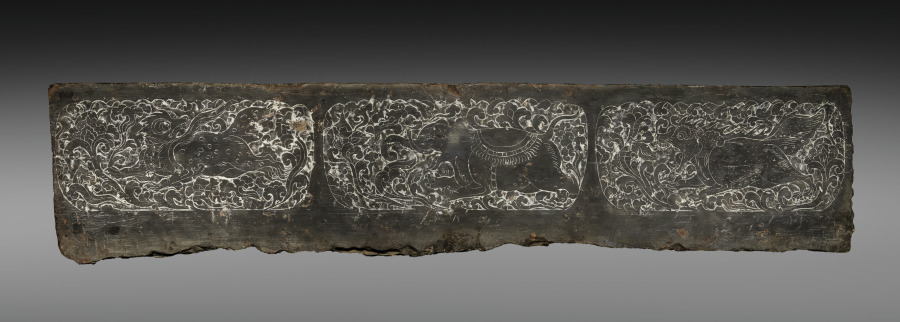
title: Section of a Sarcophagus Foundation or Epitaph Stone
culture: China, Tang dynasty (618–907)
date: late 600s–early 700s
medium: limestone with carved decoration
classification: Sculpture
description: This slab may have come from either the foundation of a house-shaped coffin or an epitaph stone that was inscribed with a dedication to the deceased. The combination of realistic and imaginary animals is typical of Tang funerary art.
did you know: A qilin, an elephant, and a chimera bound through coiling foliate and floral motifs in each cartouche.